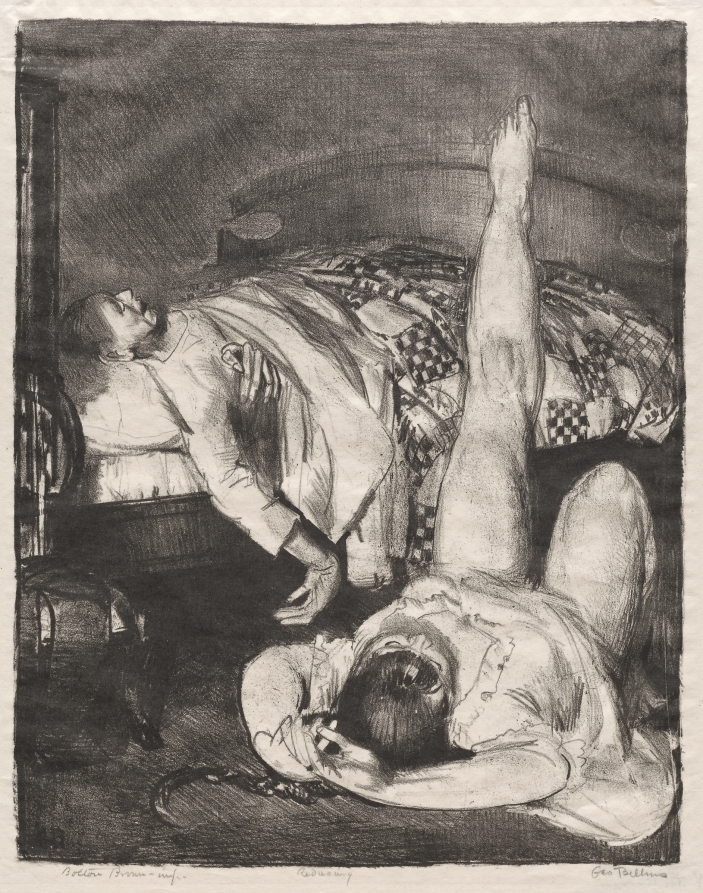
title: Reducing, Small, Third Stone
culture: America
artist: George Bellows (American, 1882–1925)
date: 1921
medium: lithograph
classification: Print